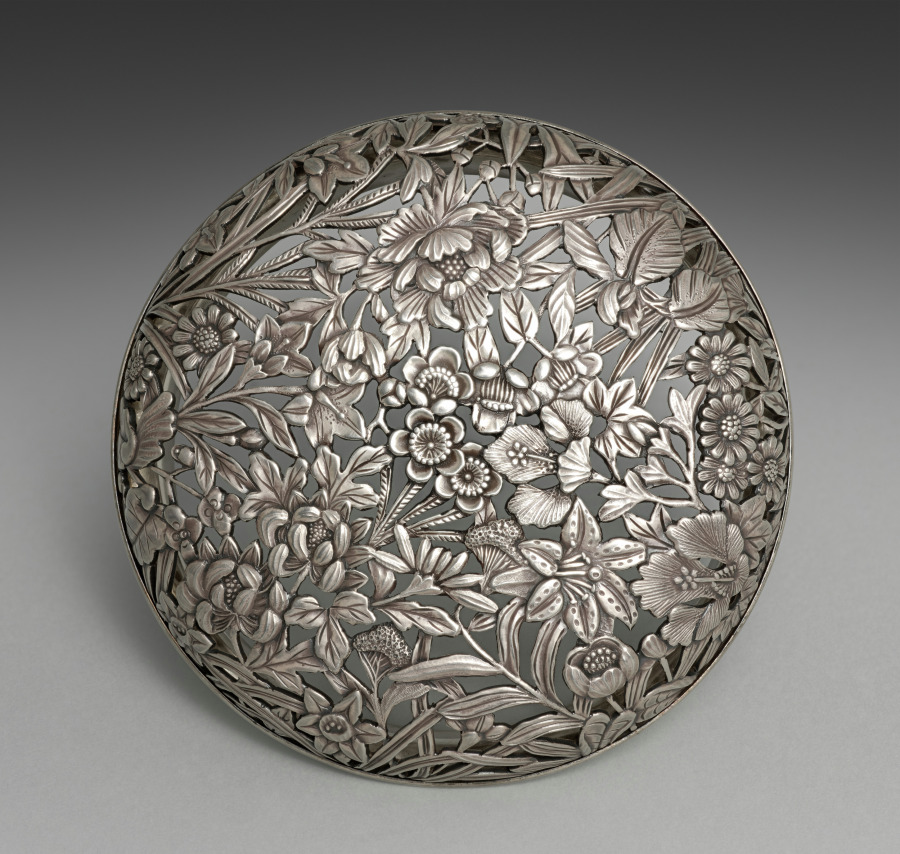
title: Lid for an Incense Burner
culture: Japan, Meiji period (1868–1912)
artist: Seifū Yohei III (Japanese, 1851–1914)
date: 1893–97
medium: Floral openwork silver lid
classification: Ceramic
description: Seifū Yohei III made incense burners in a wide variety of designs and styles. This tripod incense burner has a distinctive red-colored glaze and linear molded decorations that run around the base of the collar and down the legs. It has a variety of flowers on its lid. The glaze is described as “crimson glaze” (kōyū); it is also dappled with dark spots of varied opacity and tiny pores throughout, which gives the container a rich, textured effect.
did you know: The silver lid was produced outside the studio by metalwork specialists.